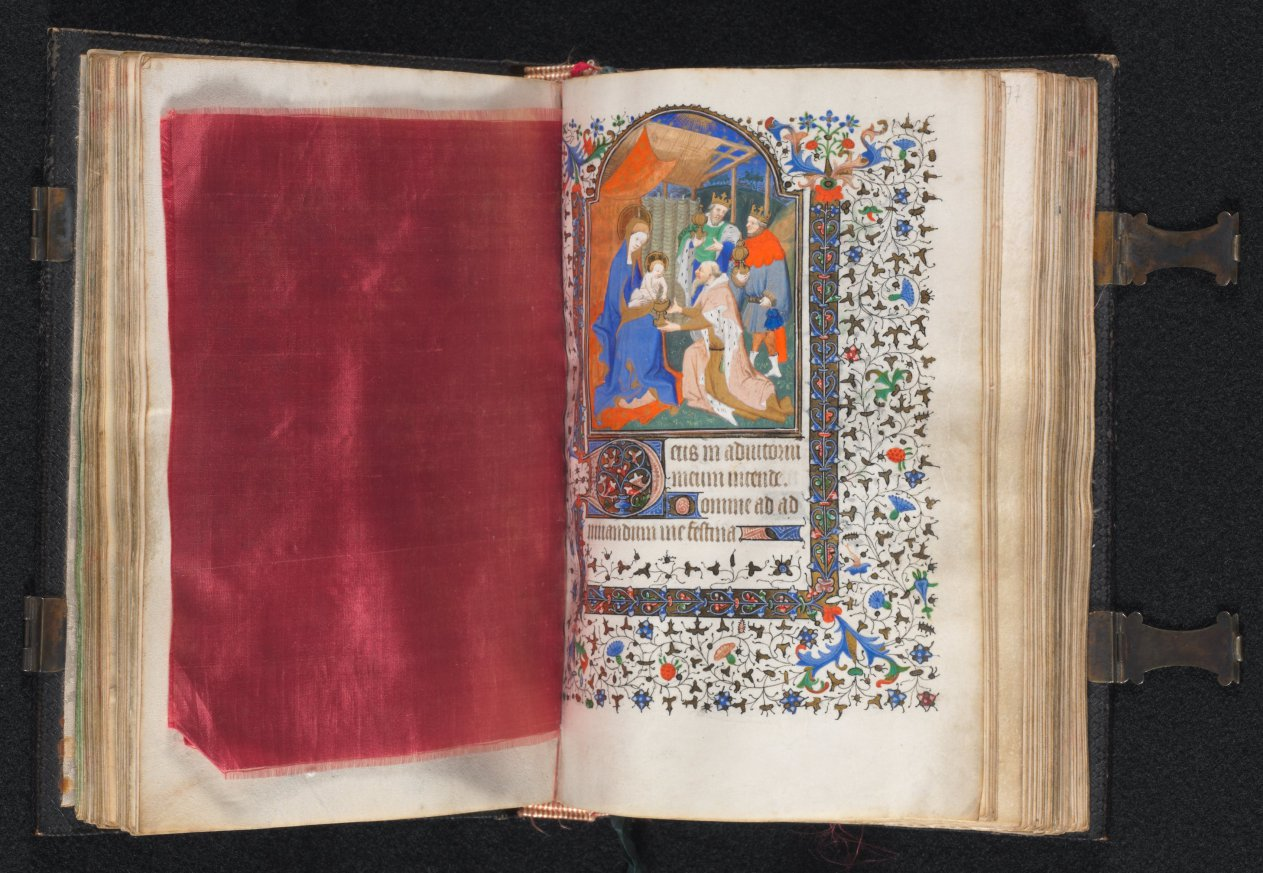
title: Book of Hours (Use of Paris): Fol. 67r, Adoration of the Magi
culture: France, Paris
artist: possibly studio or workshop of The Bedford Master (French, Paris, active c. 1405–30)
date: c. 1420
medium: ink, tempera, and gold on vellum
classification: Bound Volume